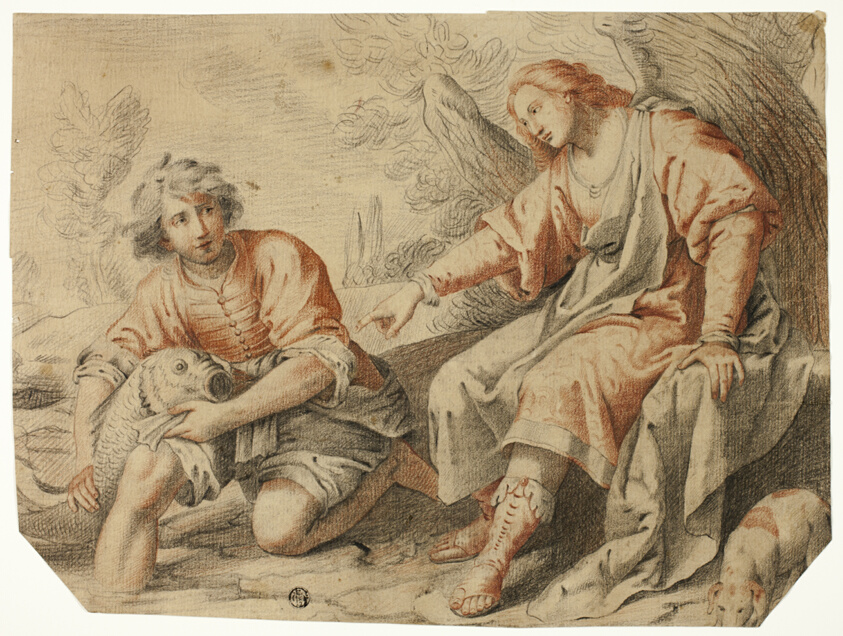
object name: Drawing and Watercolor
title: Tobias and the Angel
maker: After Matteo Rosselli; Italian, 1578-1650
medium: Red and black chalk on tan laid paper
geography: Italy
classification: chalk; drawings (visual works); prints and drawing